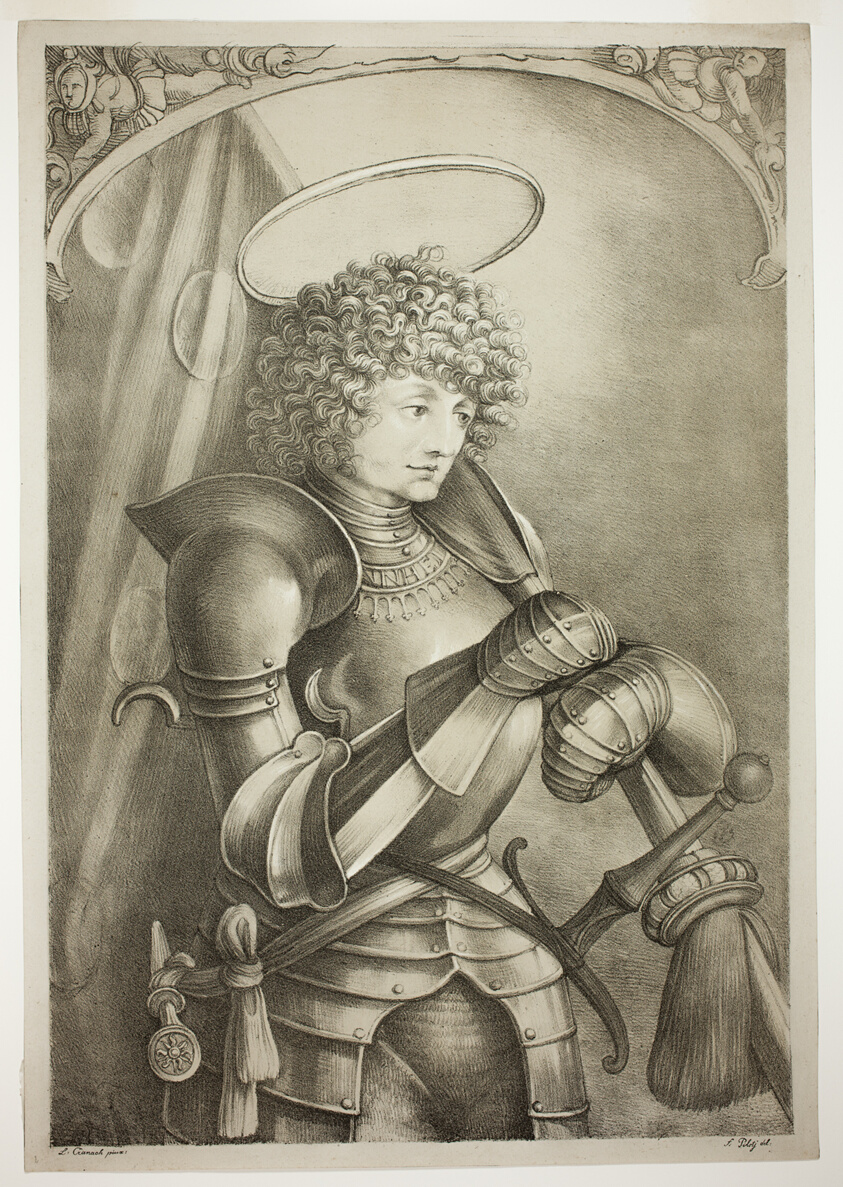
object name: Print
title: Saint George in Armor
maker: Ferdinand Piloty (German, 1785-1844); after Lucas Cranach the Elder (German, 1472-1553)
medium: Tint lithograph on cream wove paper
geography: Germany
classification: lithograph; print; prints and drawing